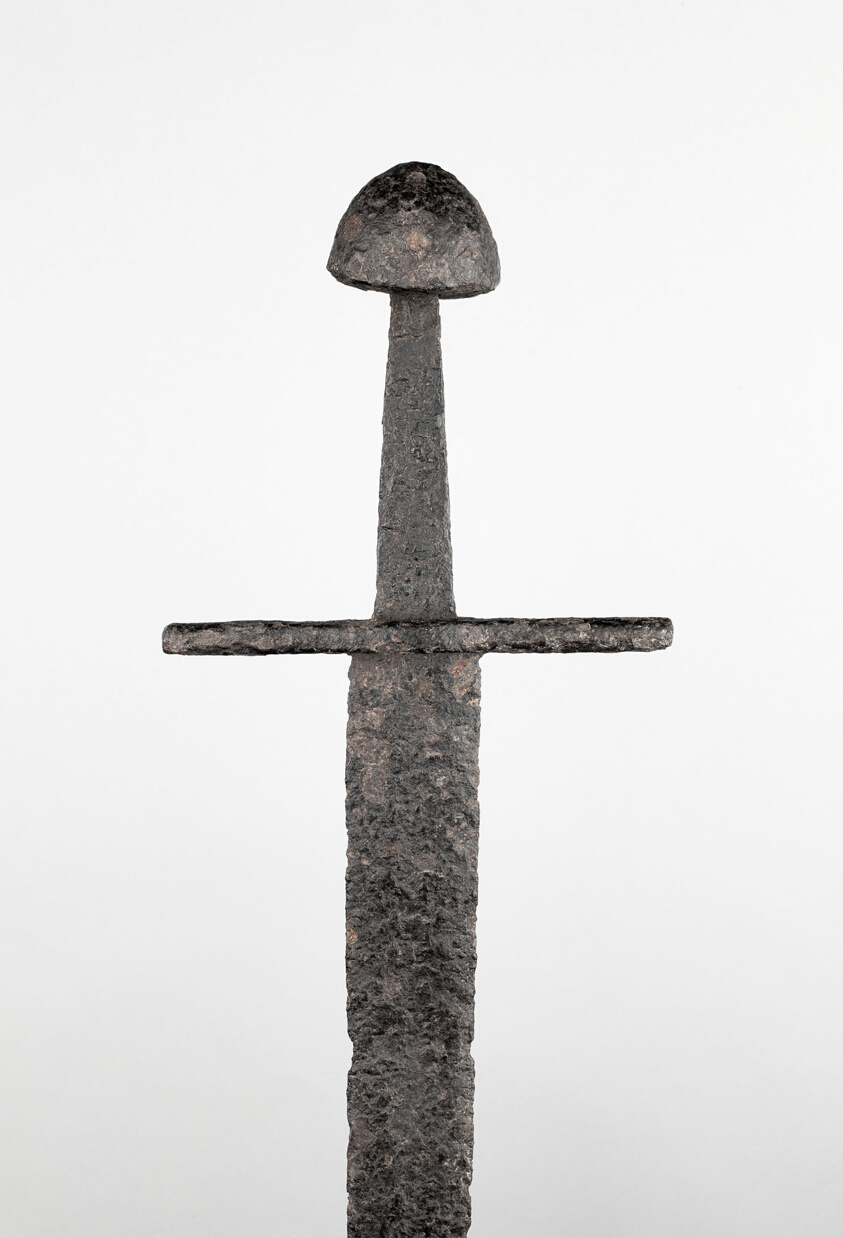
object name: Arms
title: Sword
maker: European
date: c. 1200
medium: Iron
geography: Europe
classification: edged weapon-sword; arms; arms and armor